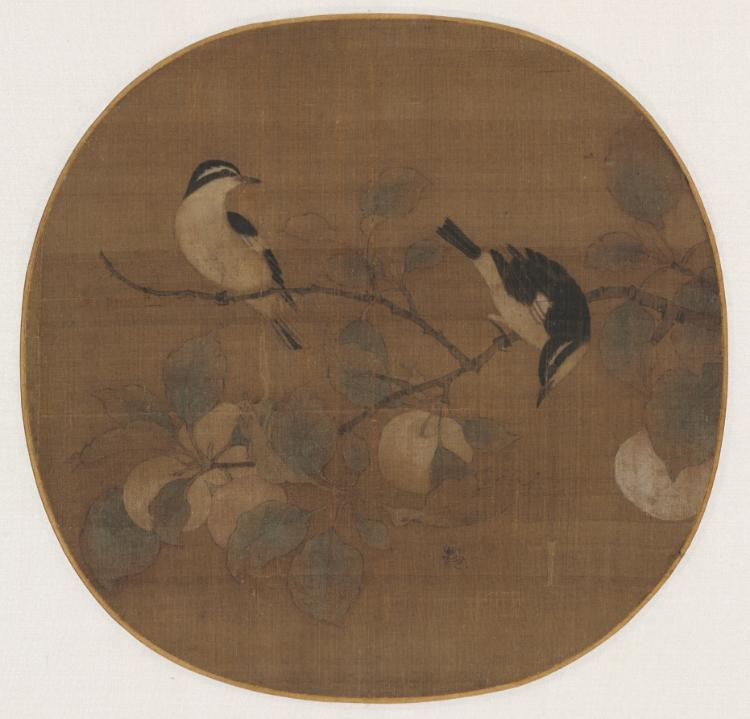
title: Birds on a Peach Branch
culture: China, Southern Song dynasty (1127–1279)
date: 1100s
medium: Album leaf; ink and light color on silk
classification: Painting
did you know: An insect is drawn to the scent of the ripe peaches. Is the bird going to catch it?